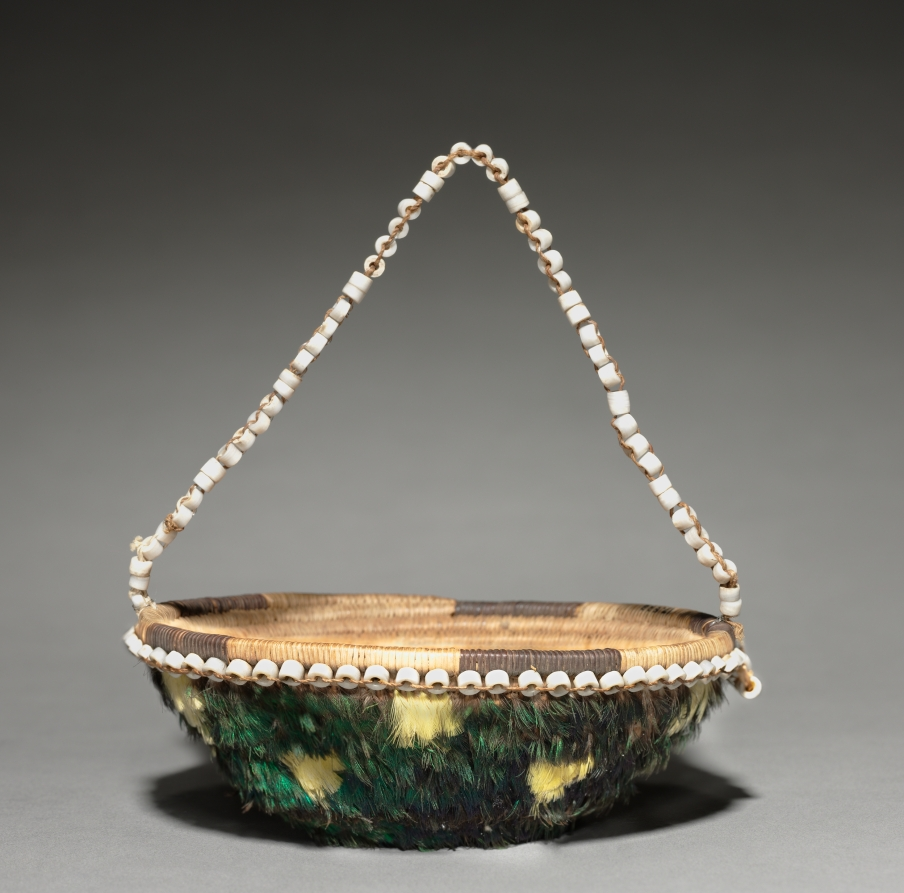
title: Gift Basket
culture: California, Pomo, late 19th- early 20th century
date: c. 1895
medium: Bulrush, Sedge with Mallard and Meadowlark Feathers, and clam shells; Coiled (3 rods)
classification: Basketry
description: Although this basket probably was not made for native use, the feathered basket is based on an older type that was exchanged among natives as a treasured gift on such occasions as ceremonies that marked the stages of life. The feathers and shell beads are symbols of prestige and wealth.